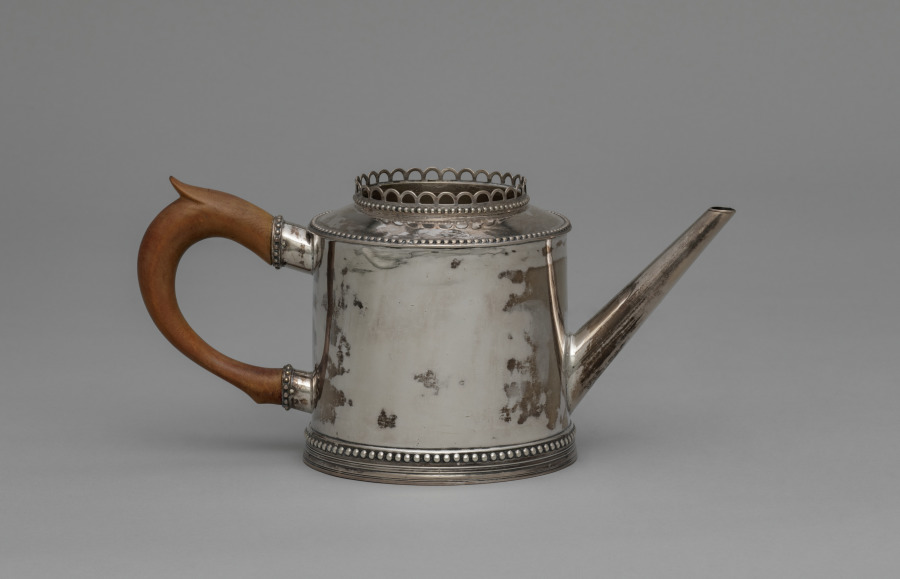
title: Teapot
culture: America, Pennsylvania, Philadelphia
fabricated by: John David (American, 1736–1793)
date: c. 1790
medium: silver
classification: Silver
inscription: engraved: "EFE" in script .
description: This teapot may have belonged to Dr. Enoch F. Edwards, George Washington’s personal physician.